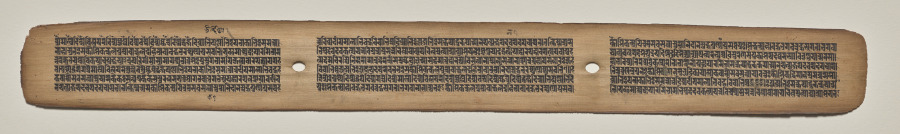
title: Text, Folio 23 (recto), from a Manuscript of the Perfection of Wisdom in Eight Thousand Lines (Ashtasahasrika Prajnaparamita-sutra)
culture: Eastern India, Bihar, Vikramashila Monastery. Painting: Nepal, Kathmandu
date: Sunday, September 14, 1119 (year 239 of the Newar Samvat in the month of Ashvina)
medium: gum tempera and ink on palm leaves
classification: Painting